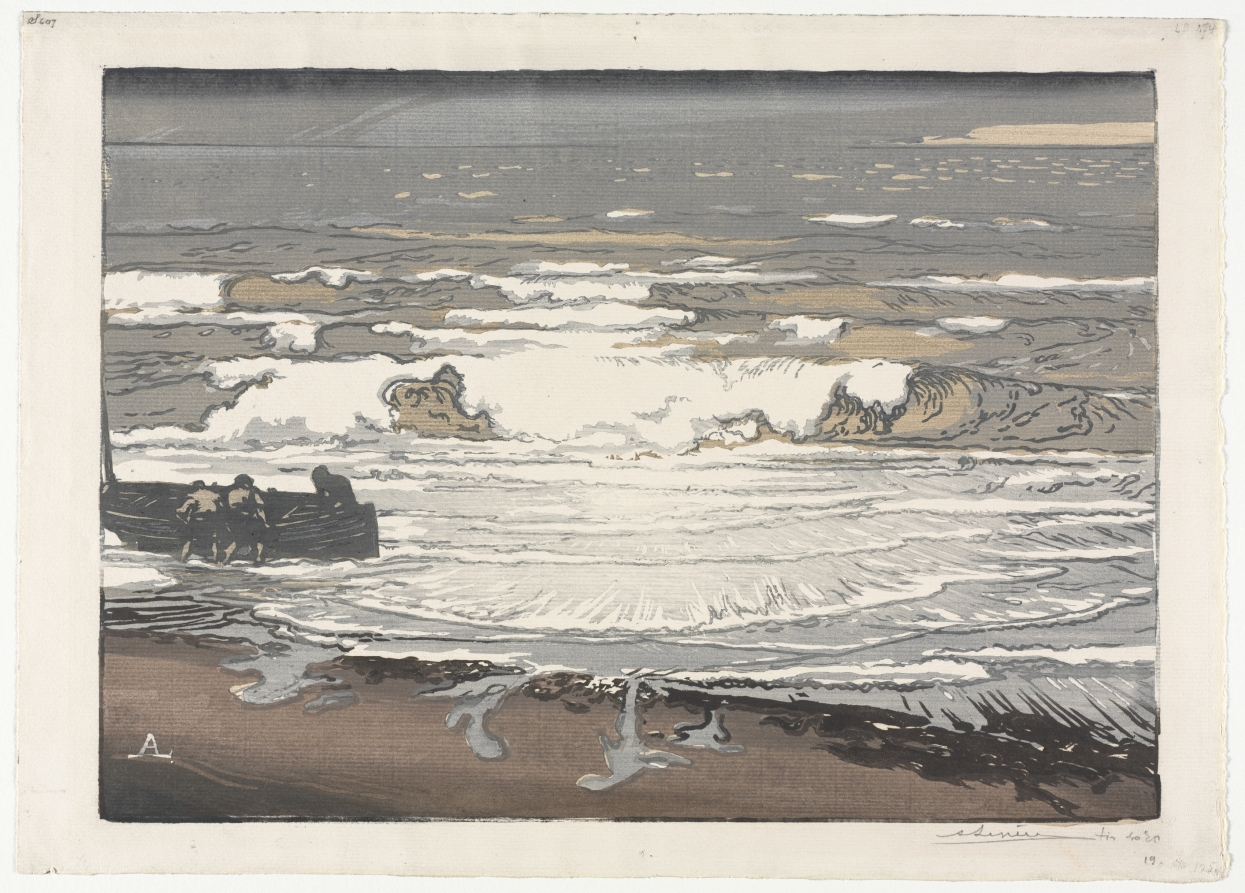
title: The Breaking Waves, Tide of September 1901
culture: France, early 20th Century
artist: Auguste Louis Lepère (French, 1849–1918)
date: 1901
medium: chiaroscuro woodcut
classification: Print